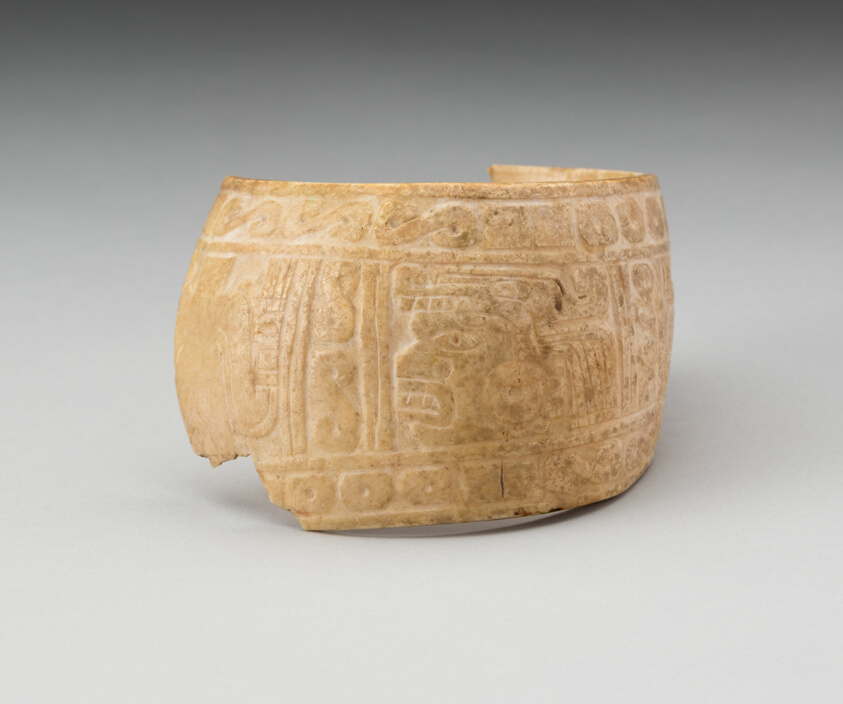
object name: Costume and Accessories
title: Shell, Possibly an Arm Band, Incised with Profile Head Framed by Geometric Motifs (Fragment)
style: mixtec, oaxacan, mesoamerican, Pre-Columbian, americas, Arts of the Americas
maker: Possibly Mixtec; Oaxaca or Guerero, Mexico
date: c. 1200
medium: Shell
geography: Guerrero state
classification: shell; jewelry; costume; art of the americas